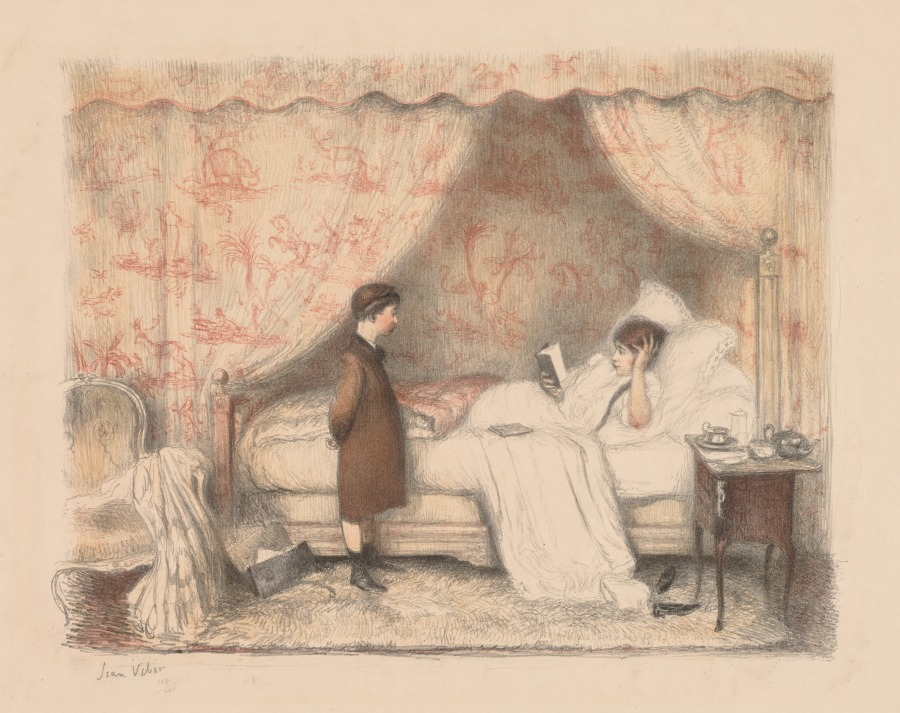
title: The Lesson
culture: France, 19th century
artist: Jean Veber (French, 1864–1928)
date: c. 1885–1928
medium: lithograph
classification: Print